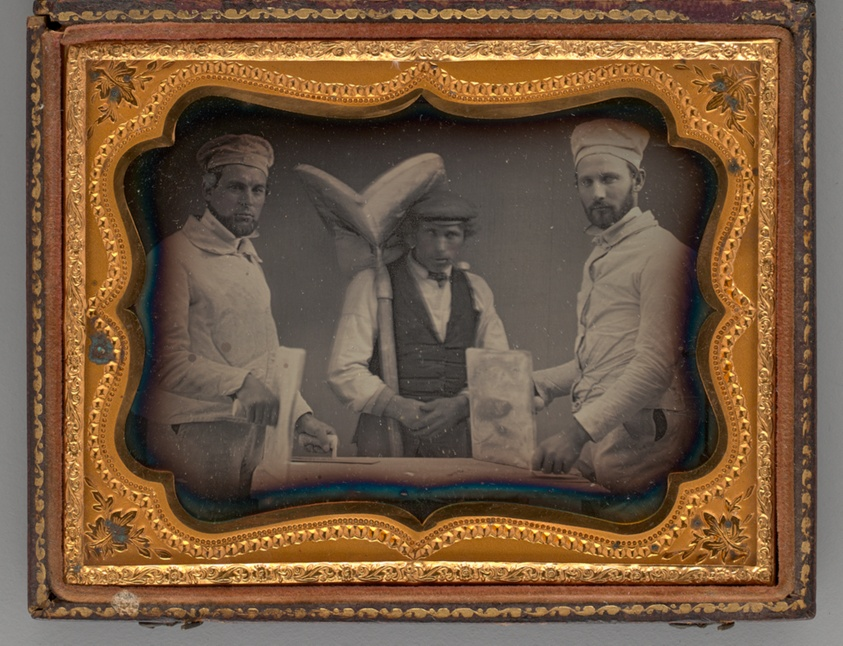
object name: Photograph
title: Untitled (Portrait of Three Standing Men)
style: 19th century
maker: Unknown maker; American, 19th century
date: 1858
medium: Daguerreotype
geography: United States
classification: portrait; daguerreotype; portrait; photograph; photographic process; photography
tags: lundberg collection, men, portraits: male subject, portraits, portrait